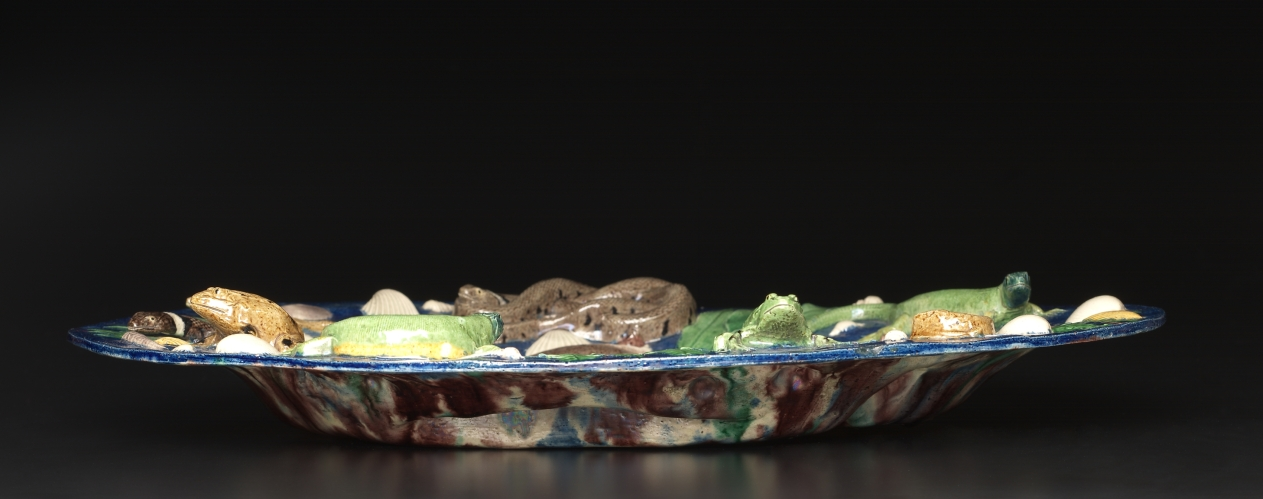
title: Platter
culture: France, 16th century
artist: circle of Bernard Palissy (French, 1510–1589)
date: late 1500s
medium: lead-glazed earthenware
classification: Ceramic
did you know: Coiled snakes, slinking lizards, and scaly fish adorn this decorative platter. Some of the naturalistic details were formed using casts of real animals.